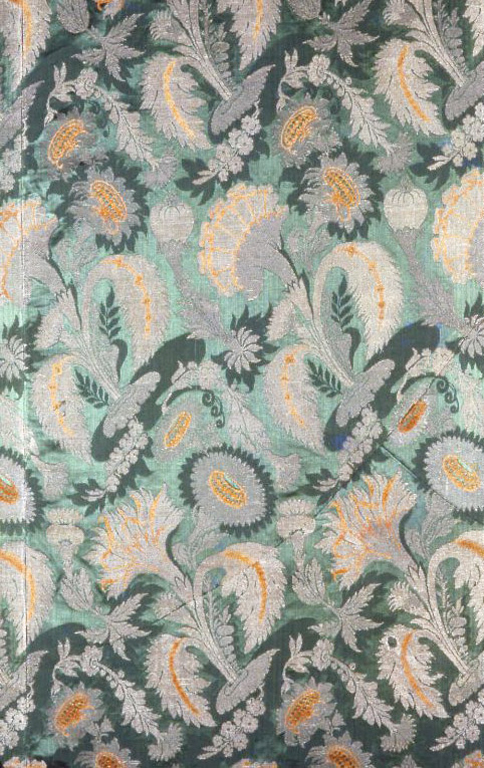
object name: Textile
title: Panel and Fragment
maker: France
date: c. 1700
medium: Silk, silk chenille, and silvered-metal-strip-wrapped silk, warp-float faced 7:1 satin weave with supplementary patterning warps bound in plain interlacing, supplementary brocading wefts bound in 3:1 twill interlacings, and self-patterned by areas of plain weave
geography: France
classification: textile; weaving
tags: fashion